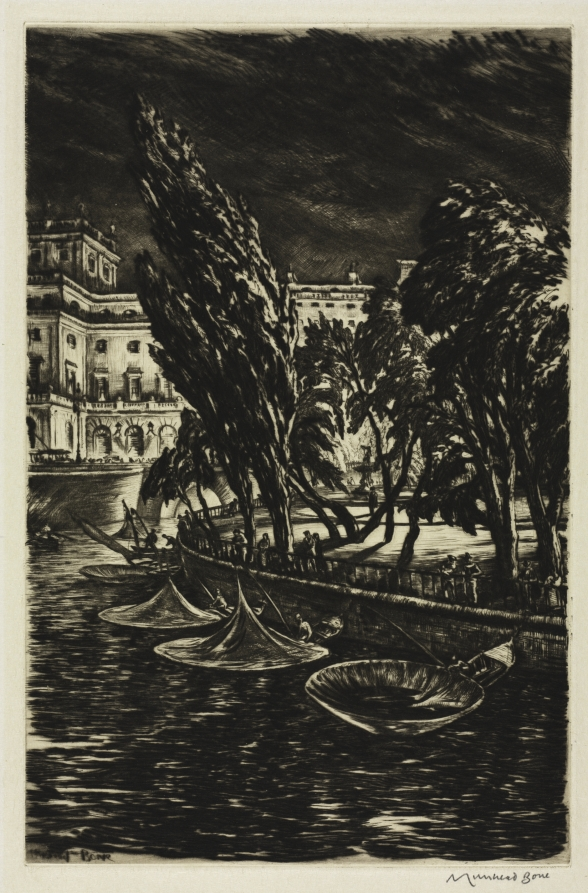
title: Windy Night, Stockholm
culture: England, 20th century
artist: Muirhead Bone (British, 1876–1953)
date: 1935, published 1936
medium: drypoint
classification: Print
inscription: Signed lower right in pencil: "Muirhead Bone" Signed lower left in plate: "Muirhead Bone" Lower margin in pencil: "VI 88 proofs Windy Night, Stockholm 13--4551 04LX A58020"